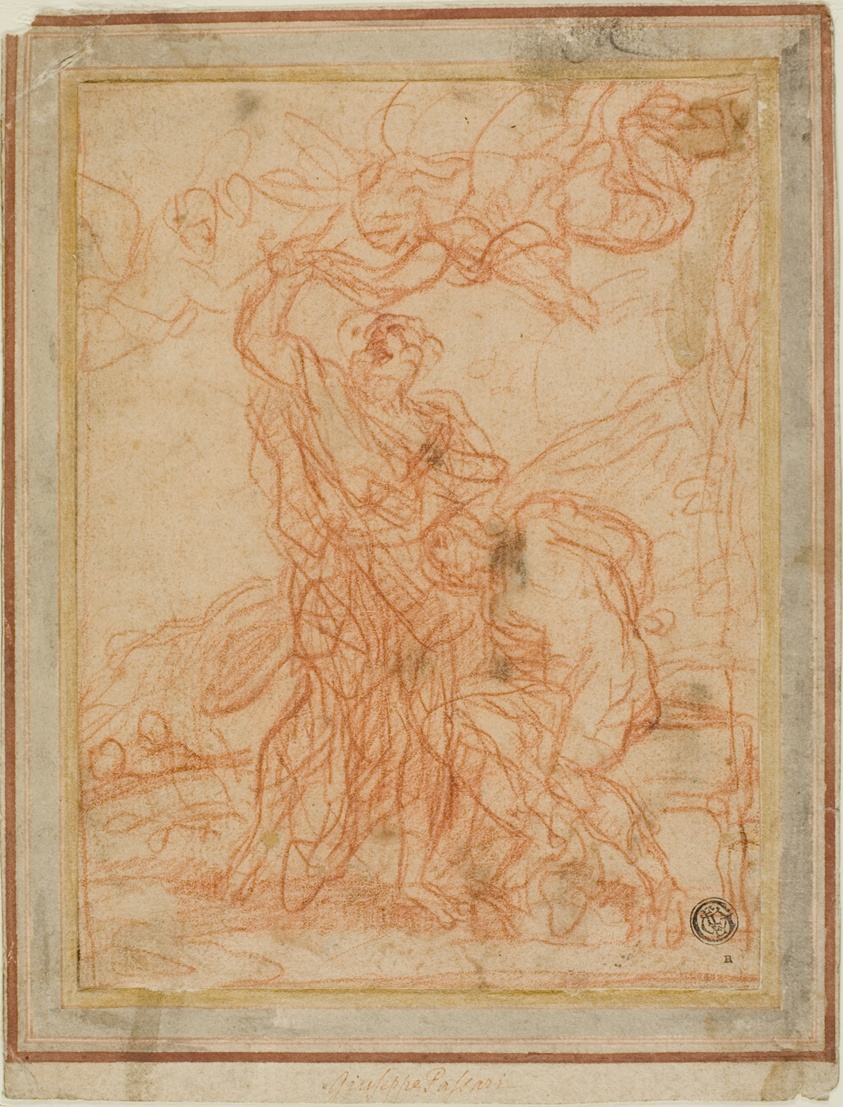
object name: Drawing and Watercolor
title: Abraham's Sacrifice (recto and verso)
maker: Attributed to Giuseppe Passeri; Italian, 1654-1714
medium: Red chalk on buff laid paper (recto) and pen and brown ink, with red chalk (verso), tipped onto cream laid paper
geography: Italy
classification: chalk; drawings (visual works); prints and drawing